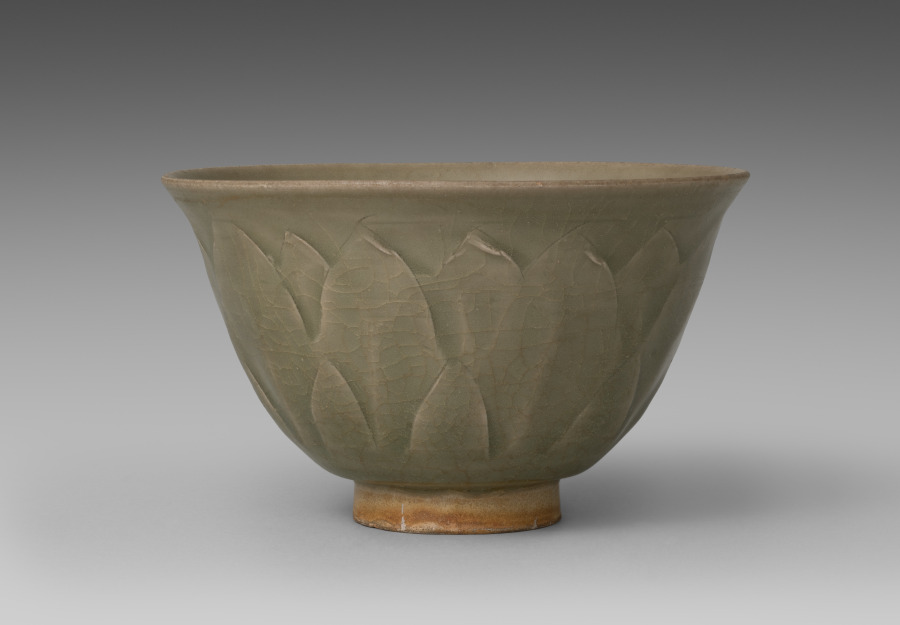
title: Bowl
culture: China, Northern Song dynasty (960–1127)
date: 1000s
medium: glazed stoneware; Northern Celadon ware, Yaozhou type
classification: Ceramic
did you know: Overlapping lotus petals cover the exterior walls of this deep bowl.